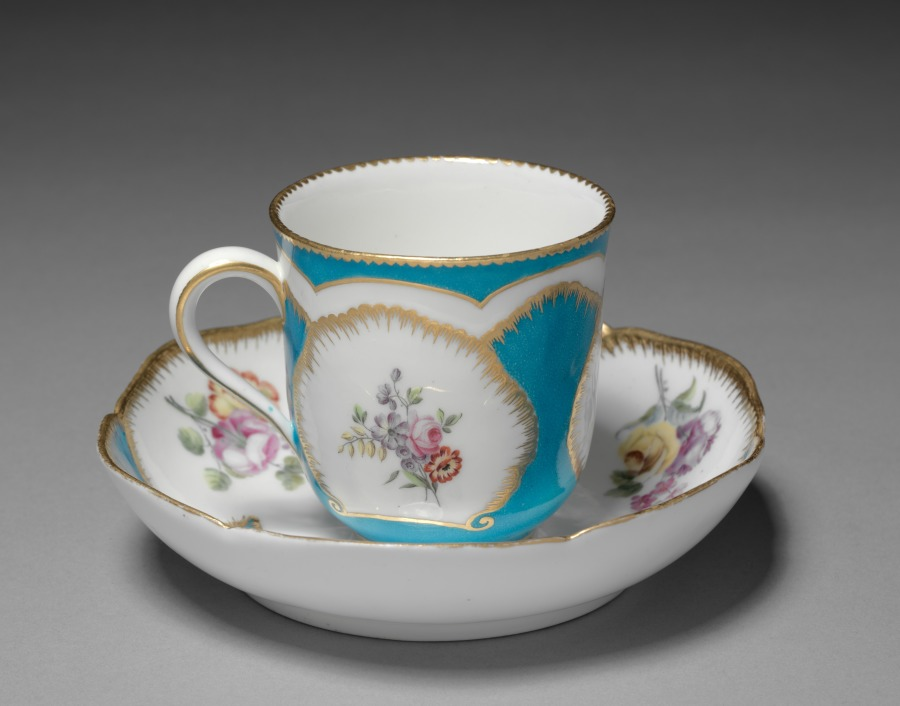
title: Cup and Saucer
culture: France, Sèvres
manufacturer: Sèvres Porcelain Factory (French, est. 1756)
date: 1759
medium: soft-paste porcelain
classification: Ceramic